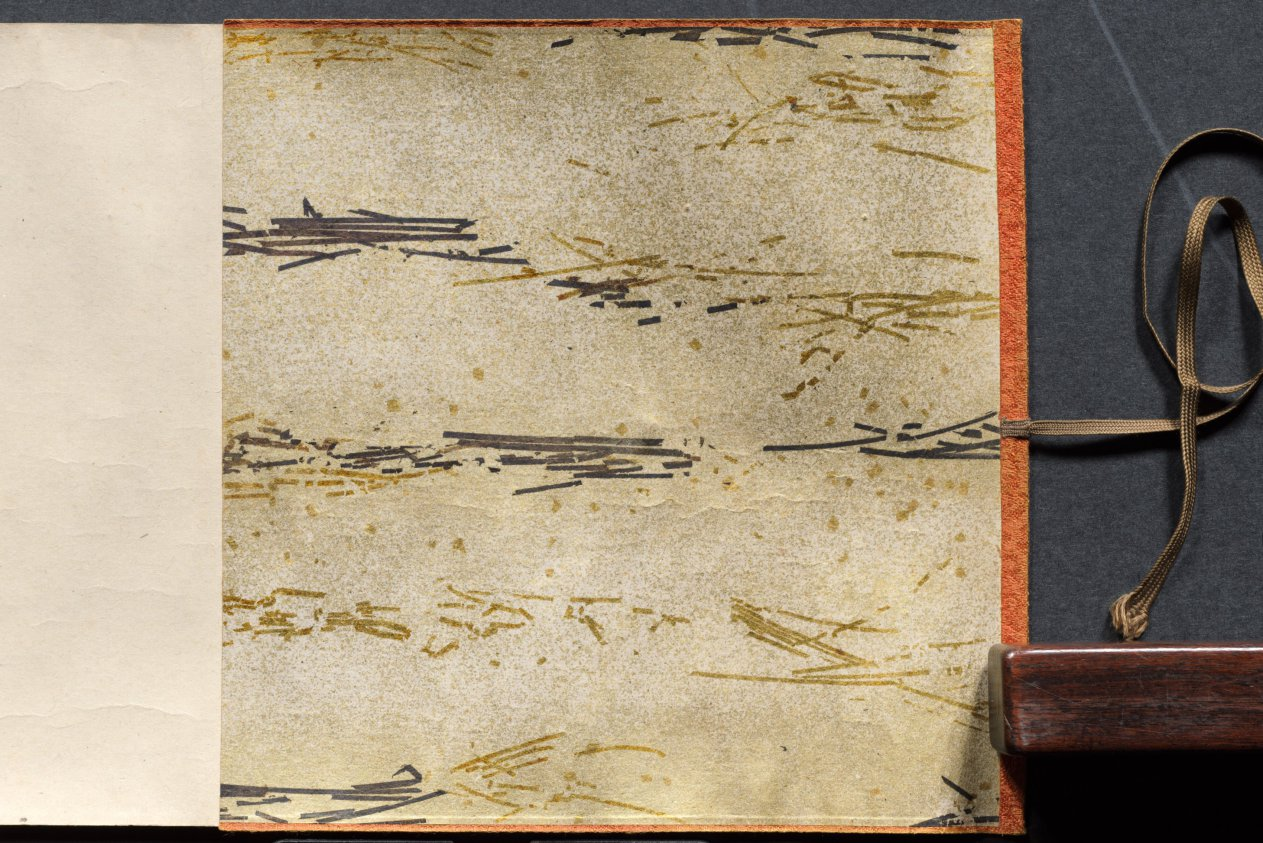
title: The Shadow Dancers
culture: Japan, Edo period (1615–1868)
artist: Yamamoto Baiitsu (Japanese, 1783–1856)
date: 1800s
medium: handscroll, ink and color on silk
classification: Painting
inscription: artist's signature and two seals at end of painting.